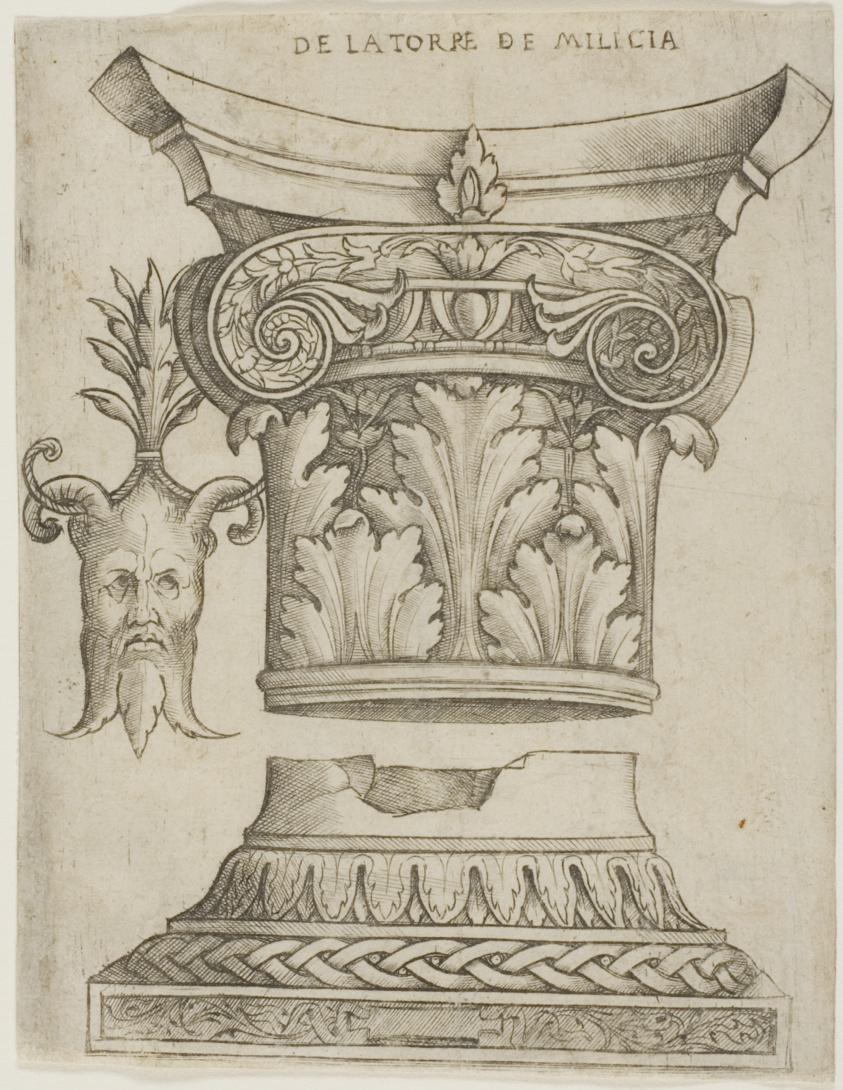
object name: Print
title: Architectural Details: Base, Capital, and Mask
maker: Giovanni Antonio da Brescia (Italian, c. 1460-c. 1520)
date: c. 1515, or later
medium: Engraving in dark brown on ivory laid paper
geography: Italy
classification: engraving; print; prints and drawing